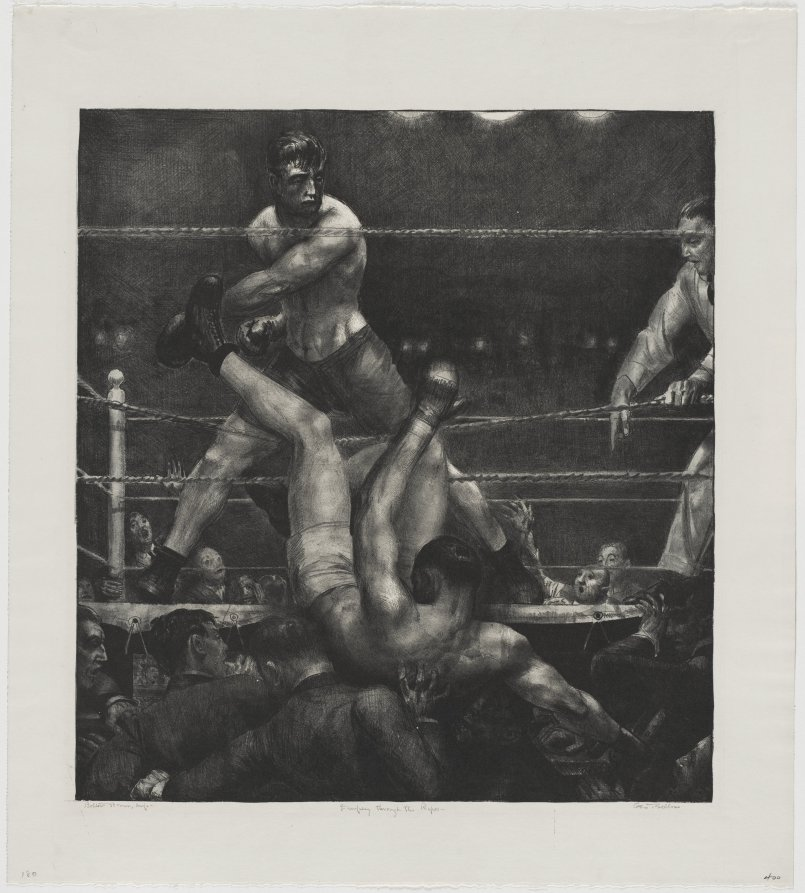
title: Dempsey Through the Ropes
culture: America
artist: George Bellows (American, 1882–1925)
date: 1924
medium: lithograph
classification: Print